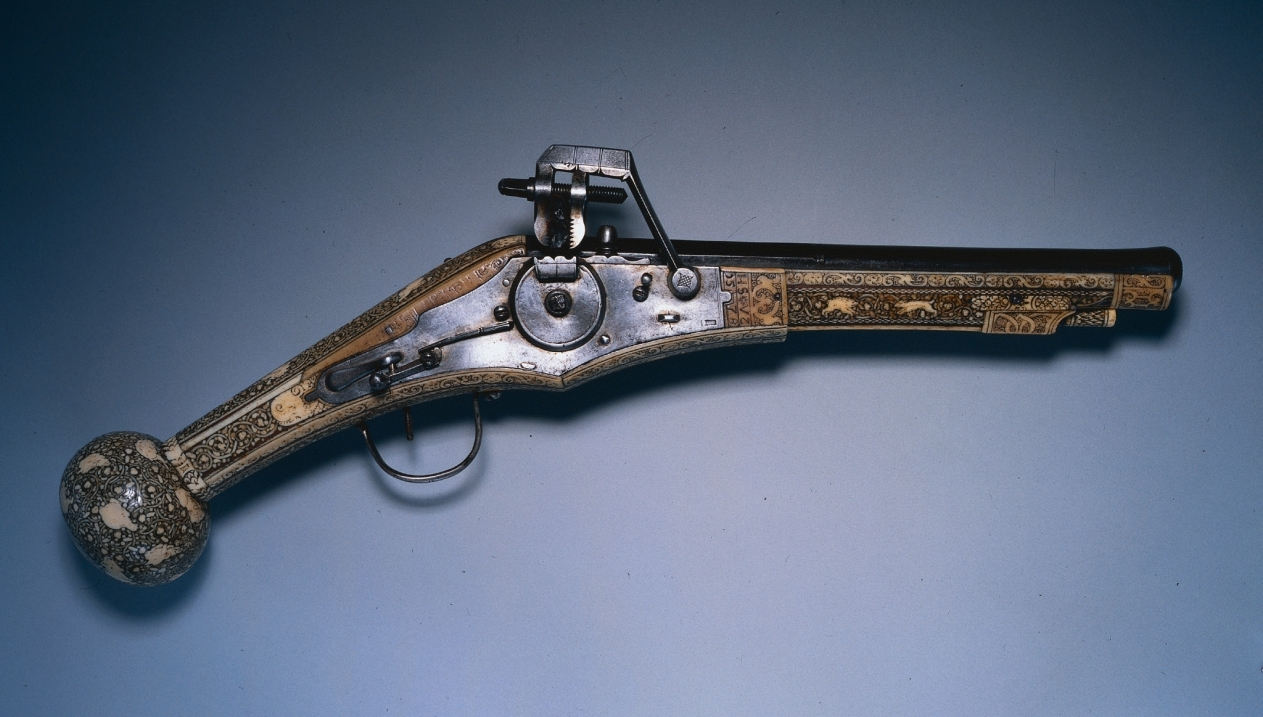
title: Wheel-Lock Hunting Pistol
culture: South Germany, 16th century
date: 1578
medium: steel, walnut stock with engraved stag horn; ball butt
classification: Arms and Armor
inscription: near lock plate: HSVZ 1578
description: The walnut stock of this pistol is inlaid with engraved stag horn in the form of interlacing foliage and arabesques interspersed with putti, birds, and animals—an elegant weapon befitting a noble patron. Since pistols of this type could deliver only one shot and had to be reloaded to fire the next round, they were commonly made in pairs to be worn in leather holsters. The large ball-shaped pommel on the grip made it easier to withdraw the pistol from its holster, and also served as a counterweight to a heavy steel barrel. Additionally, the pommel became a useful weapon when the firing mechanism failed or when close quarters required its use.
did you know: In this time period nobles bred dogs to help them hunt boars; on the barrel of this gun, a boar is shown charging a dog.